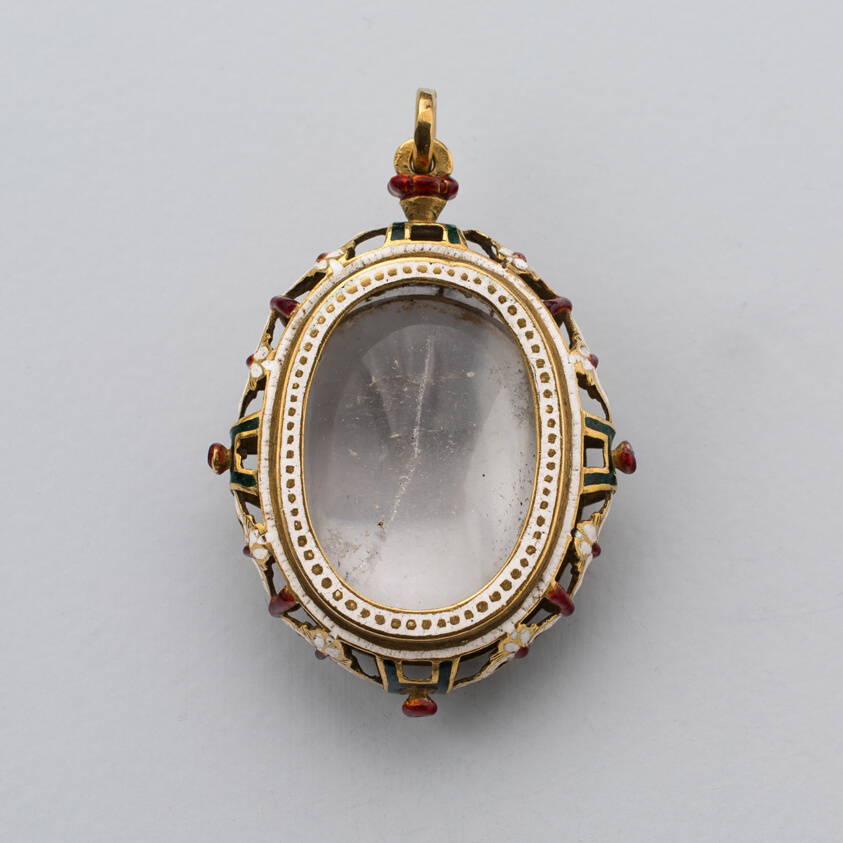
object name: Decorative Arts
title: Pendant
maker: Spanish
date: 17th century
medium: Enameled gold and rock crystal (missing interior image)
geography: Spain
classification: pendant (jewelry); jewelry; european decorative arts; decorative arts